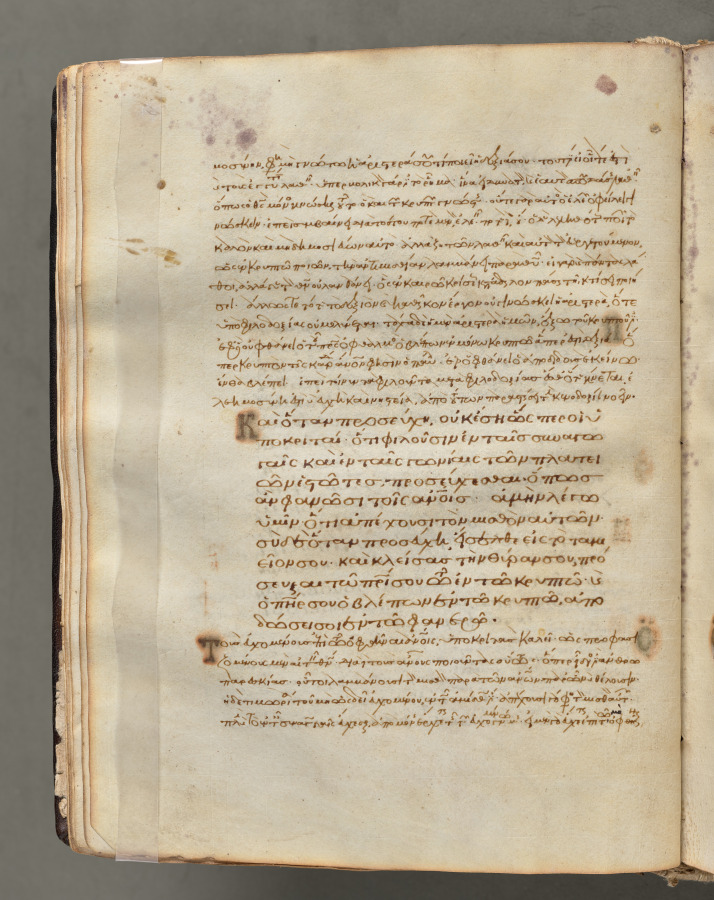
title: Text, folio 24 (verso), from a Gospel Book with Commentaries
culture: Byzantium, Constantinople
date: c. 1000–1100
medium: ink, tempera, and gold on vellum; leather binding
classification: Bound Volume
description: Each of the four gospels in this book opens on a page with brilliantly illuminated borders depicting the author of the text as well as birds—principally peacocks, symbols of the immortality of the soul—and fountains, representing the fountain of life and the salvation of the soul. This volume consists of 428 leaves with texts in Greek. Its level of sophistication suggests that it was probably written and decorated in a monastery in Constantinople.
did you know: Gospel books were carried in procession through Byzantine churches.